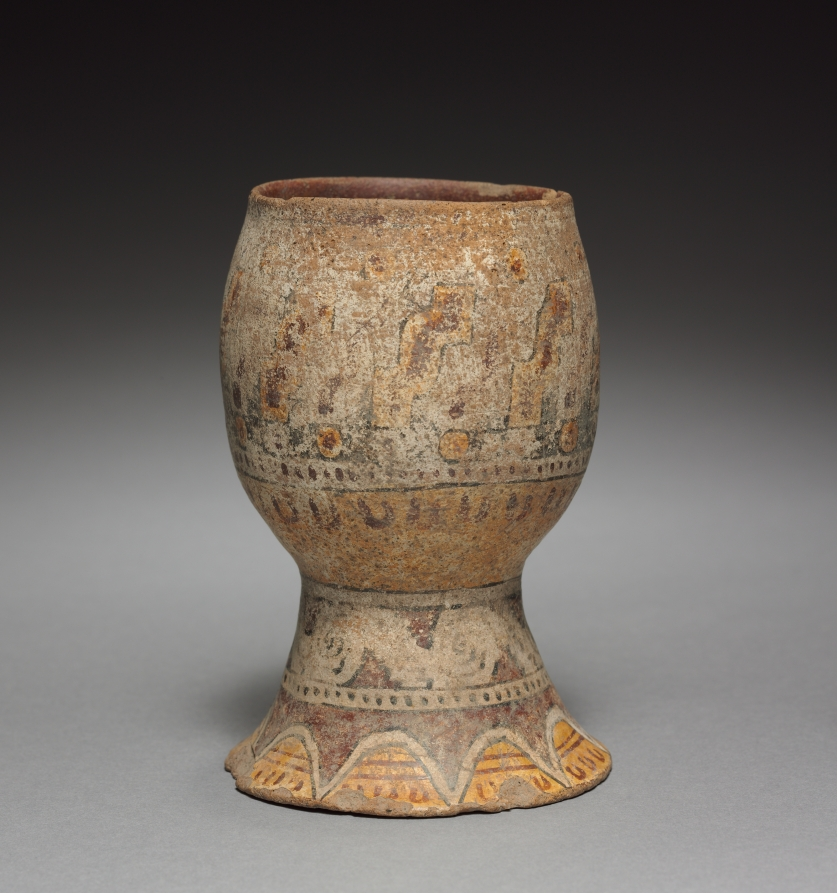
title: Drinking Cup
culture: Mexico, Cholula(?), Mixteca-Puebla style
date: 900–1519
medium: pottery with burnished, colored slips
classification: Sculpture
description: After about the year 800, several Mixtec kingdoms developed in the regions known today as Oaxaca and Puebla in southern Mexico. Mixtec artists excelled in creating small-scale, fine works of art, including polychrome pottery. A Mixtec noble may have used this well-painted goblet to drink chocolate or pulque, a fermented beverage made from the sap of the maguey cactus.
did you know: Pulque, once the drink of gods and rulers, is now available in a can.